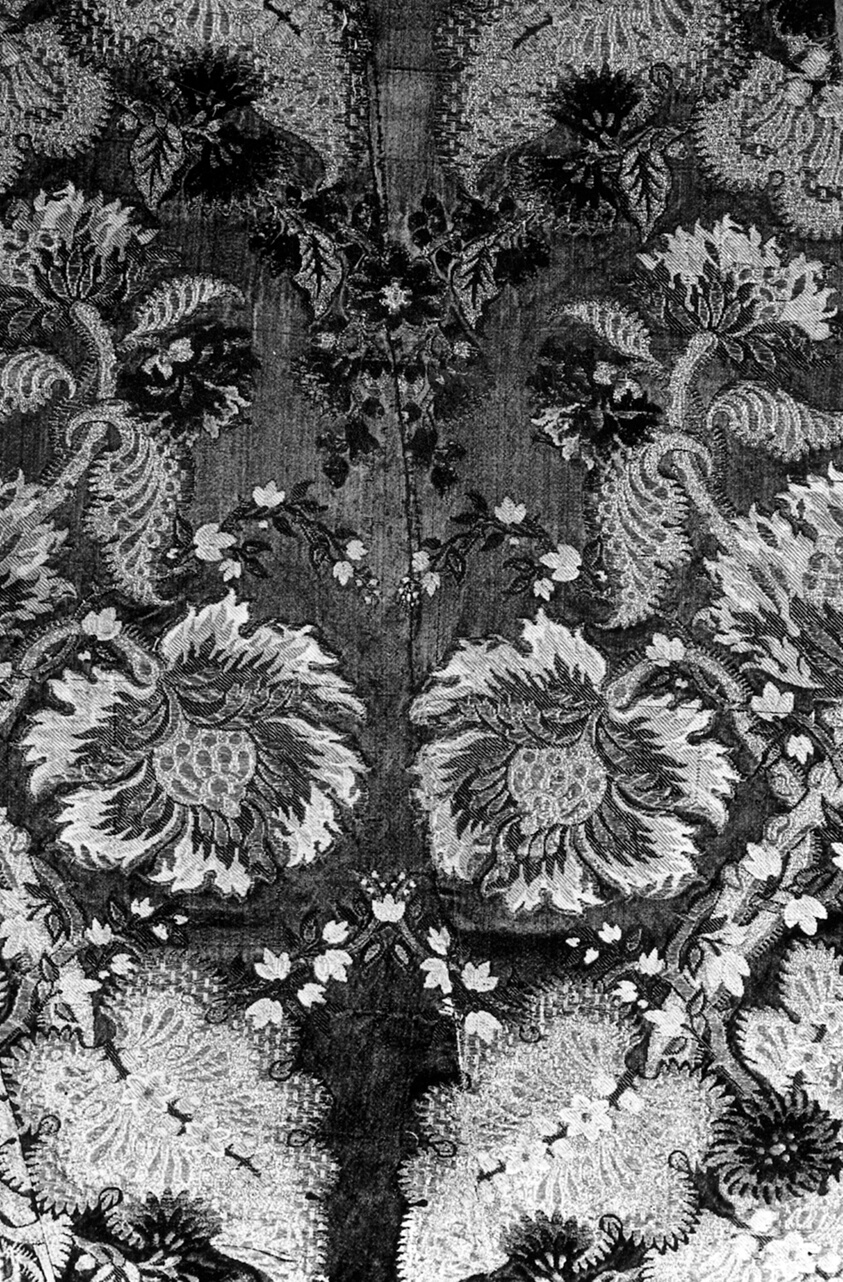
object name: Textile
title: Panel (Possibly from a Chasuble)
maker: France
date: c. 1732/33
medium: Silk and silvered-metal-strip-wrapped silk, warp-float faced 4:1 satin weave with supplementary binding warps tying some supplementary brocading wefts and self-patterning two-color complementary ground wefts in twill and plain interlacings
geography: France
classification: textile; weaving; liturgical